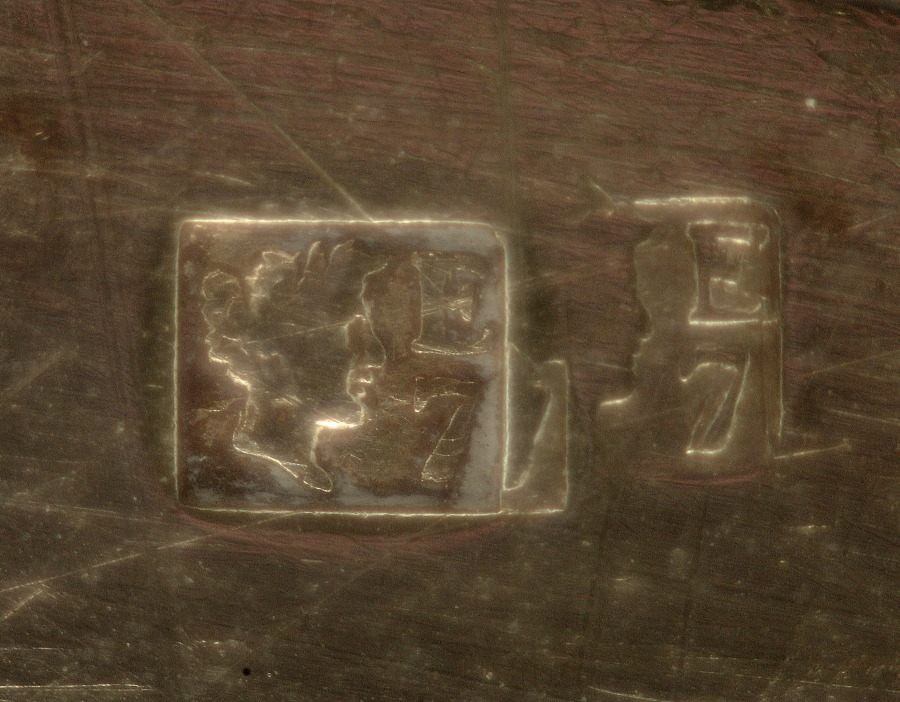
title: Covered Tureen on Stand (Pot à oille)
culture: France, late 18th-early 19th Century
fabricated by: Henry Auguste (French, 1759–1816)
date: 1797–98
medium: silver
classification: Silver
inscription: [Coat-of-arms of Amoral don Federico Carlos Gravina on bowl; cover; stand]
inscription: [Assay mark for large-sized work, 1798-1809, lining exterior; tureen foot exterior]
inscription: [Assay mark for medium-sized work, 1798-1809, beneath stand foot; on edge of cover]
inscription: [Maker's mark of Henri Auguste, master silversmith in 1785, beneath tureen foot; beneath stand foot; inside stand foot edge]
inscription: [Official assay mark for first standard silver, Paris, 1798-1809, beneath stand foot; lining exterior; on cover]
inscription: [Official mark for silver imported from countries with customs conventions, 1838-1912, beneath stand foot; edge of cover; tureen lip exterior; lining exterior; on one tureen handle; outside stand foot; tureen foot exterior]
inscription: [Unknown mark, possibly Ceres' profile in square with "E" and "7", beneath stand foot; on cover; rim of lining; tureen foot exterior; tureen lip exterior]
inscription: [Unofficial assay mark for first standard silver, Paris, 1794-1797, beneath foot stand; beneath tureen foot; near tureen handle exterior]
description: This pot-à-oille was designed by master goldsmith Henri Auguste after drawings by draftsman and sculptor Jean Guillaume Moitte. Though many of the neoclassical decorative elements on this piece are pulled from Moitte’s design, Auguste’s final product leaves out much of the proposed ornamentation. Instead this object finds distinction in its large size and smooth expanses of silver that emphasize the purity of its lines.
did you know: The coat of arms on the body of the work corresponds to the family of Federico Carlos Gravina, a Sicilian-Spanish admiral who was known to have had a close diplomatic relationship with Napoleon I.